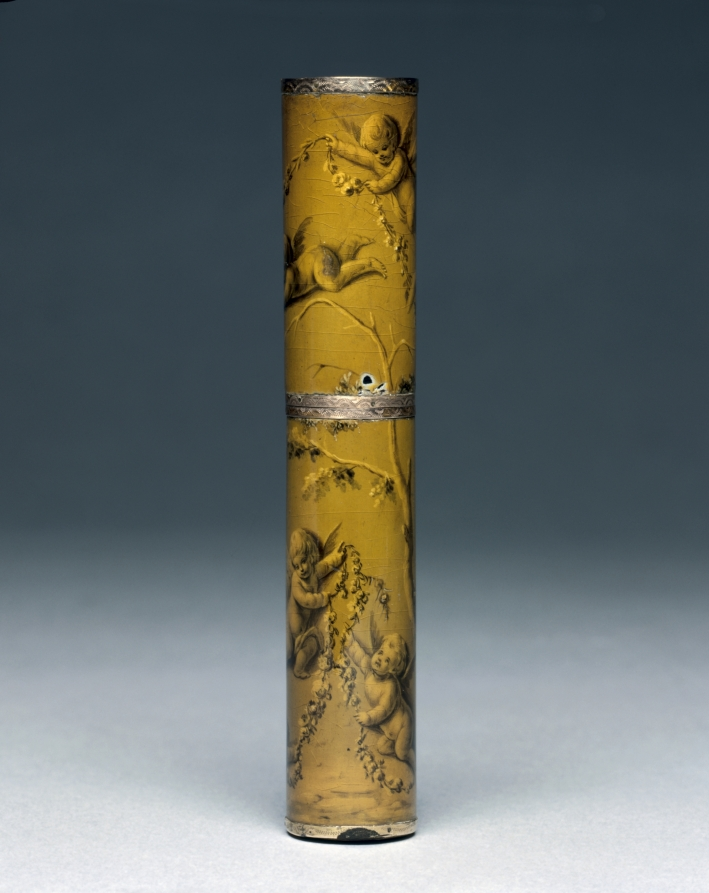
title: Needle Case (Etui à Aiguilles)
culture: France, Paris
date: 1768–69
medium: painted wood, gold mounts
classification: Miscellaneous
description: The material of cases like these delineated the status of the holder. More expensive materials such as ivory, tortoiseshell, or silver were reserved for wealthier users while more common cases were made of lacquered papier-mâché or wood. This wooden case is decorated with vernis martin, a domestic varnish imitating East Asian true lacquer. The sinuous lines, floral garlands, and putti, personifications of love in the form of winged infants, exemplify typical rococo imagery.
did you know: In the 1500s these cases were commonly fabricated to hold pins and needles for master tailors, but became more widely produced for women during the 1700s.